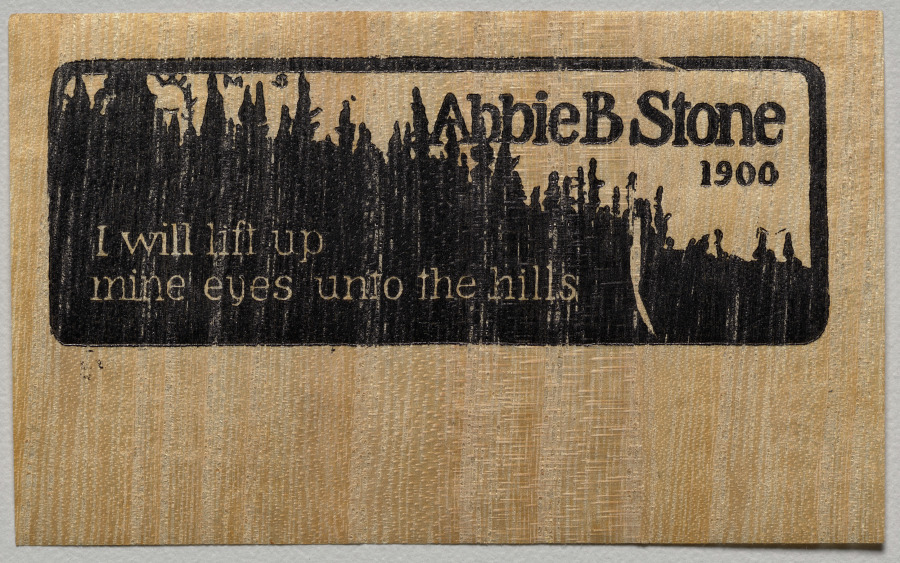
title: Bookplate: Abbie B. Stone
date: 1900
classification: Print